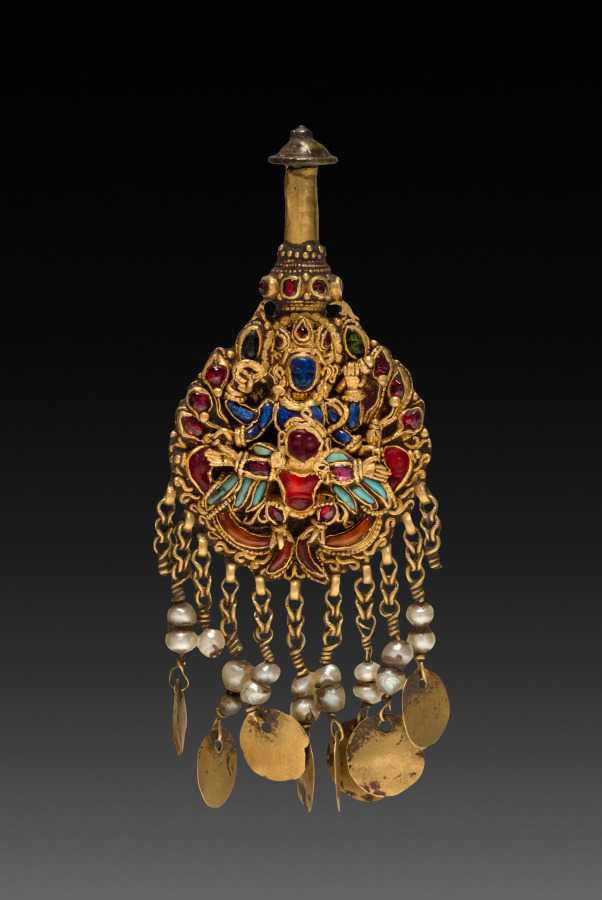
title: Earring with Vishnu Riding Garuda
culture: Nepal, Kathmandu Valley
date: 1600s or 1700s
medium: Gold set with precious and semiprecious stones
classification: Jewelry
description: This earring was made to hang on sculptures of deities worshipped in Nepalese temples. Nepalese craftsmen excelled at the detailed encrustation of jewels to depict complex figural imagery. They shaped gold wires into a framework, then inserted polished stones into the spaces, held in place with an adhesive. Four-armed Vishnu is made of sapphires; his mount the man-eagle appears to be made of carnelian and spinel with wings of turquoise.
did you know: This was among the first works to enter the museum's collection.